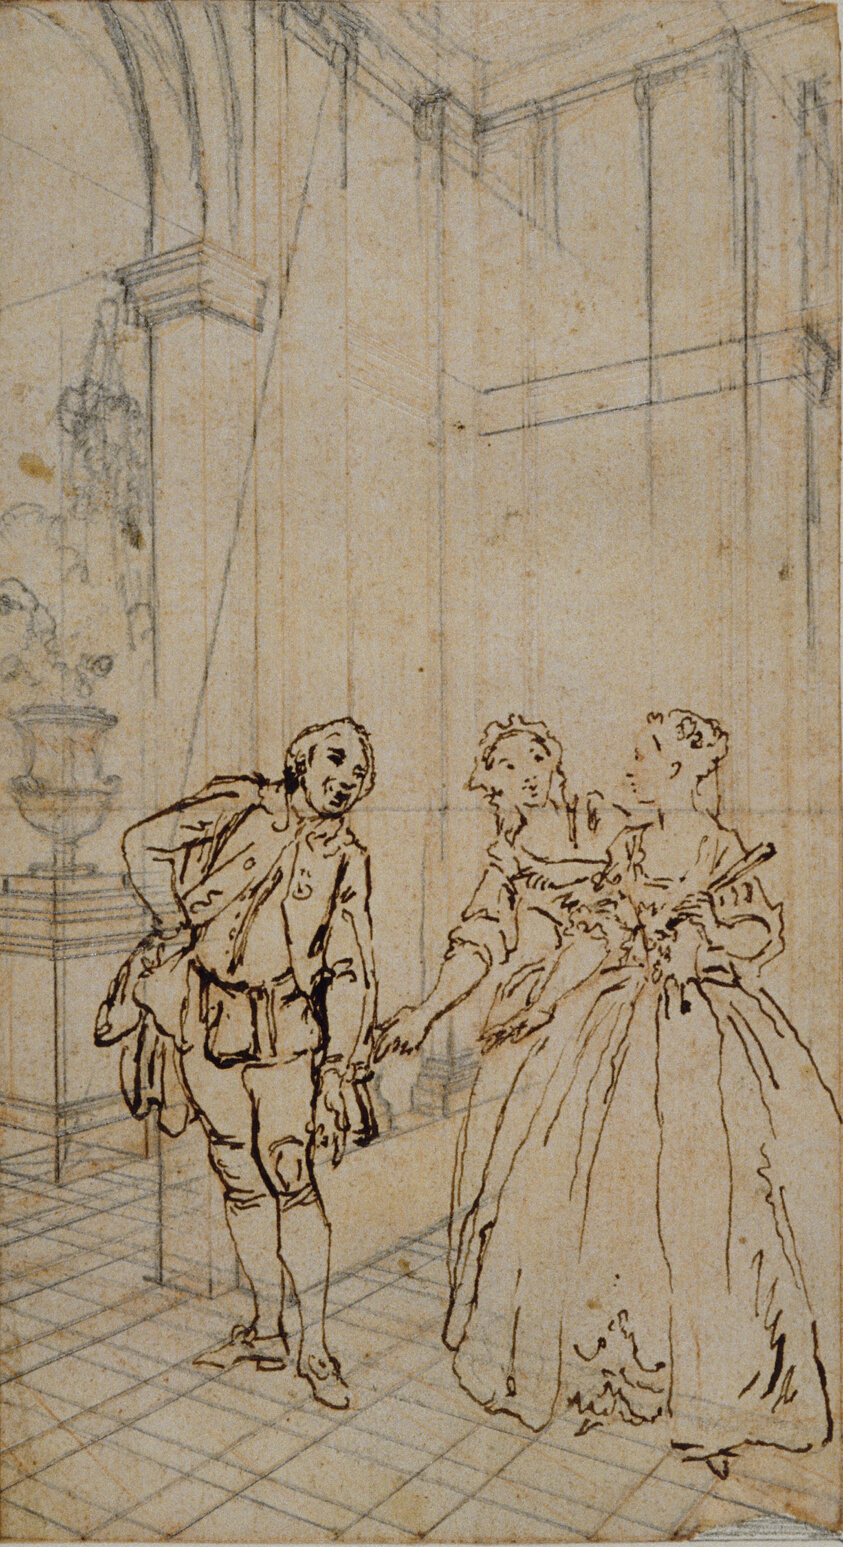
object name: Drawing and Watercolor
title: Literary Illustration with Gentleman and Two Ladies in Interior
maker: Hubert François Gravelot (French, 1699-1773)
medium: Pen and brown ink and graphite, over red chalk, on buff laid paper, laid down on ivory laid paper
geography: France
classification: pen and ink drawings; drawings (visual works); prints and drawing